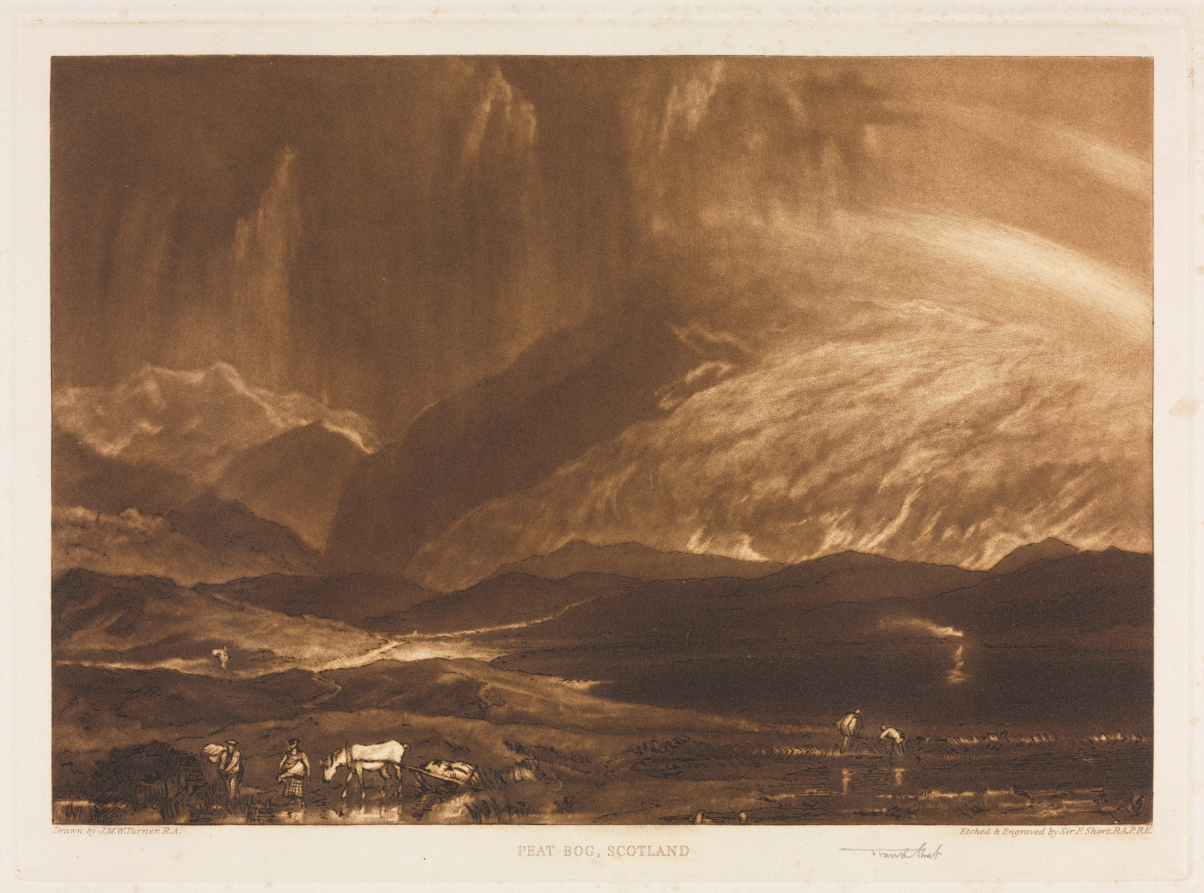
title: Peat Bog, Scotland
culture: England, 20th century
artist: Frank Short (British, 1857–1945)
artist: after Joseph Mallord William Turner (British, 1775–1851)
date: 1937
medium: etching and mezzotint in brown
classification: Print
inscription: Lower right, in pencil: "Frank Short" Bottom right, in pencil: "N279 H16."